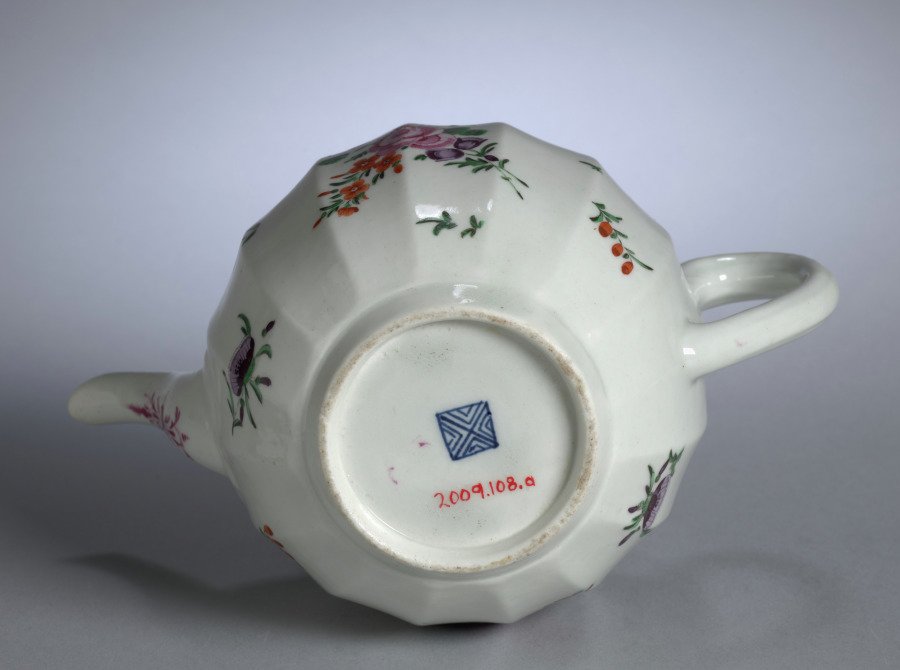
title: Teapot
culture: England, Worcester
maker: Worcester Porcelain Factory (British, established 1751)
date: c. 1755–75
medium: porcelain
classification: Ceramic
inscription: Mark on the bottom - An X with radiating lines inside a box.